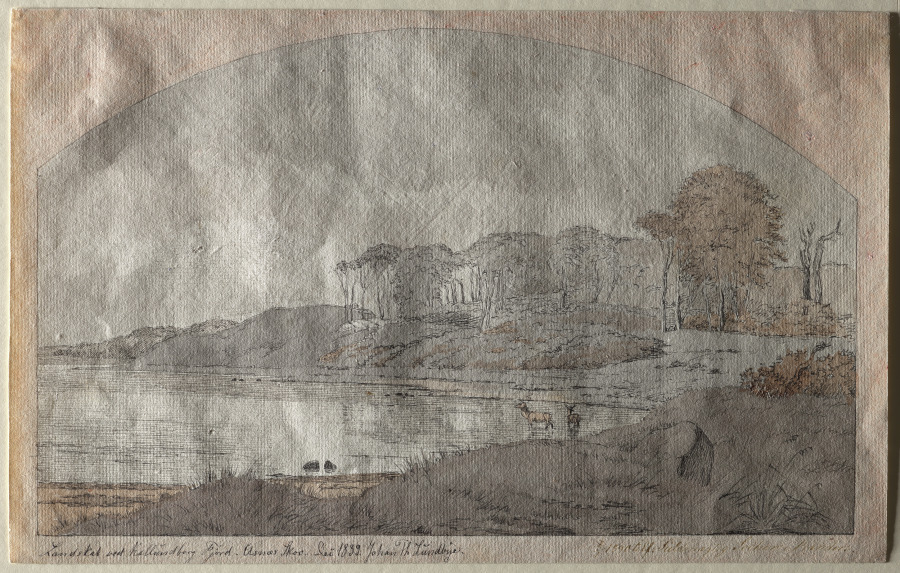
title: Asnæs Skov, Bay at Kalundborg Fjord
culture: Denmark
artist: Johan Thomas Lundbye (Danish, 1818–1848)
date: 1839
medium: Pen and black ink and gray and brown ink washes with arched framing line in pen and black ink, bordered in pink watercolor on modern cream laid paper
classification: Drawing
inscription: Inscribed and signed, black ink, lower left: Landskab ved Kallundborg Fjord. Asnæs Skov. Dec 1839. Johan Th Lundbye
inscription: inscribed, black ink, lower right: 2/1 1840 tilf. Fuldmagtig Secher i Kanders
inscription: Stamped, on verso, black ink, lower left: mark of Kunstforeningen (Lugt 988c)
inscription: inscribed, ink, lower left: Kunstforeningen København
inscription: inscribed, pencil, at center: 2/1 40 [illeg.] Secher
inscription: inscribed, pencil, lower right: 10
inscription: Watermark, at center: C&I HONIG / XX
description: Johan Thomas Lundbye belonged to the youngest generation of artists working during Denmark’s Golden Age, a period of unprecedented creative activity. This drawing depicts a wooded area on a narrow bay near the town where the artist grew up. Lundbye worked outdoors, directly from nature, aiming to create a work that conveyed his experience of nature. With exacting precision, he conveyed the scene’s solitude and featured a large dolmen, meant to allude to the region’s ancient past.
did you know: Copenhagen’s Kunstforeningen, an exhibition society for contemporary art, purchased this drawing from Lundbye shortly after its creation—a practice meant to extend the organization’s support of artists.